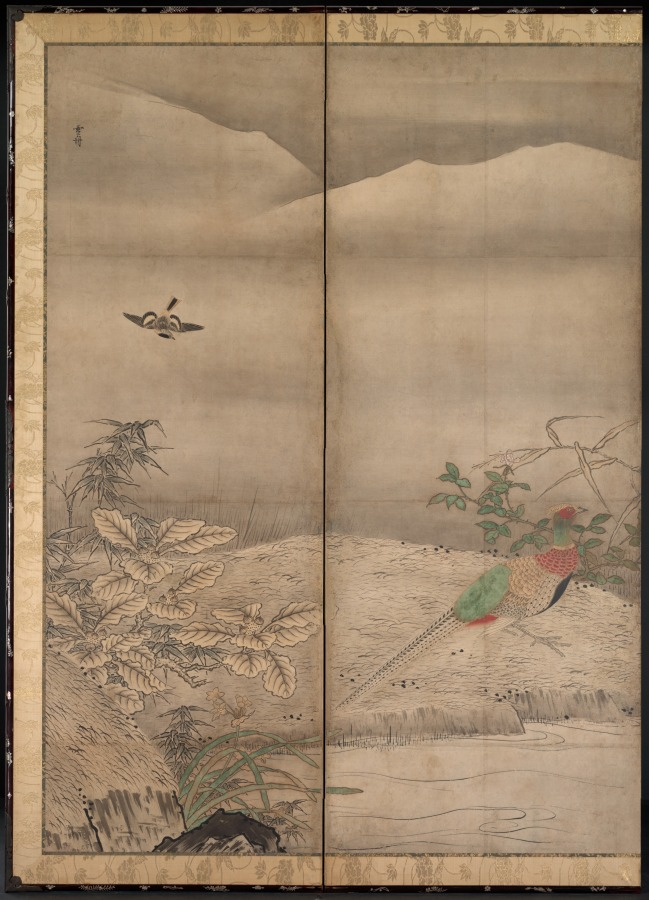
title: Birds and Flowers in a Landscape of the Four Seasons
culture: Japan, Muromachi period (1392–1573)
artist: follower of Sesshū Tōyō (Japanese, 1420–1506)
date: 1550–99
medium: Six-panel folding screen, ink and color on paper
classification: Painting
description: The monk-painter Sesshū is revered today, as he was in his own time. While he left Kyoto's sophisticated intellectual and cultural environment to live in a provincial village in a far western province, he seems never to have severed contacts with the monastic communities of his young adulthood. His residence in Yamaguchi proved fortuitous because his patron, the region's military lord, enjoyed considerable freedom in conducting trade missions overseas with Korea and China. Sesshū went to China in 1467 and traveled about the country, visiting well-known historical sites and Chan (Zen) temples before returning two years later. Thus he became familiar with contemporary painting practices, materials, formats, and subject matter. His assimilation and then transmission of these elements had a profound impact on the following generations of ink painters, patrons, and Zen communities throughout Japan. Despite the presence on these byōbu of the name "Sesshū," they are from the hand of another accomplished but as yet anonymous follower active in the middle of the sixteenth century. Sesshū's name here, as on a handful of similar bird-and-flower byōbu, attests to the master's identification at that time with the colorful mural paintings on the same theme emanating from Ming dynasty China. This genre had heretofore been relegated to hanging scroll compositions, so the intro-duction into temple and daimyo residences of such an attractive theme surely caused considerable excitement in the later fifteenth century, when in all likelihood Sesshū introduced it into the Japanese painting repertoire. Subsequently, artists of varying backgrounds and training tried their hands at these large, dramatic scenes. From right to left the composition portrays an array of flowering plants in the near distance that indicate the passage of the seasons. Birds, usually paired, occupy this setting, engaged in various activities that lend naturalism and an air of peacefulness. The world they inhabit may be characterized pictorially by expansive middle-ground waterscapes that end where the far distant mountains rise as backdrops. These features appear consistently in other bird-and-flower byōbu attributed to Sesshū. Also noteworthy is the absence of any birds of prey such as the samurai's beloved hawks, emblems of fierceness and graceful strength that appear often in the byōbu of sixteenth-century Kano and Soga school painters.